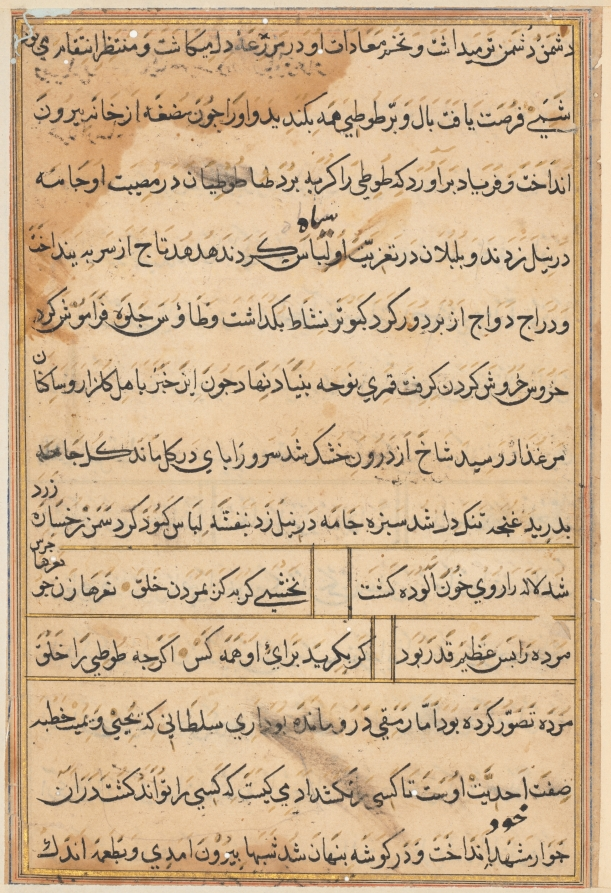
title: Tuti-Nama (Tales of a Parrot)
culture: Mughal India, court of Akbar (reigned 1556–1605)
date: c. 1560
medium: gum tempera, ink, and gold on paper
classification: Painting